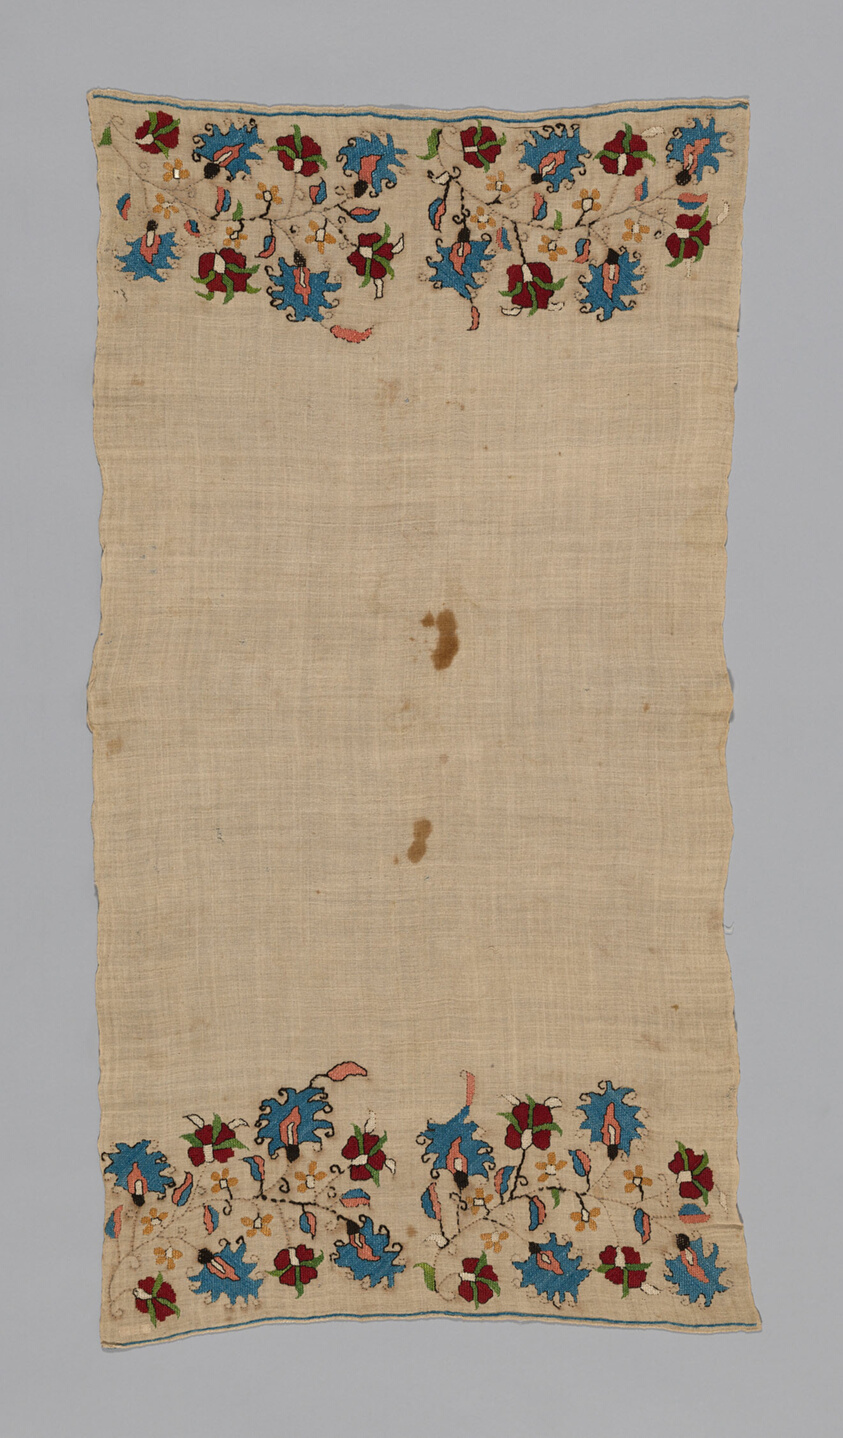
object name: Textile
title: Towel/Napkin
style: turkish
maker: Turkey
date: 17th century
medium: Linen, plain weave; embroidered with silk in double running, twined double running and stem stitches; both selvages present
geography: Turkey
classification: textile; needlework (visual works)